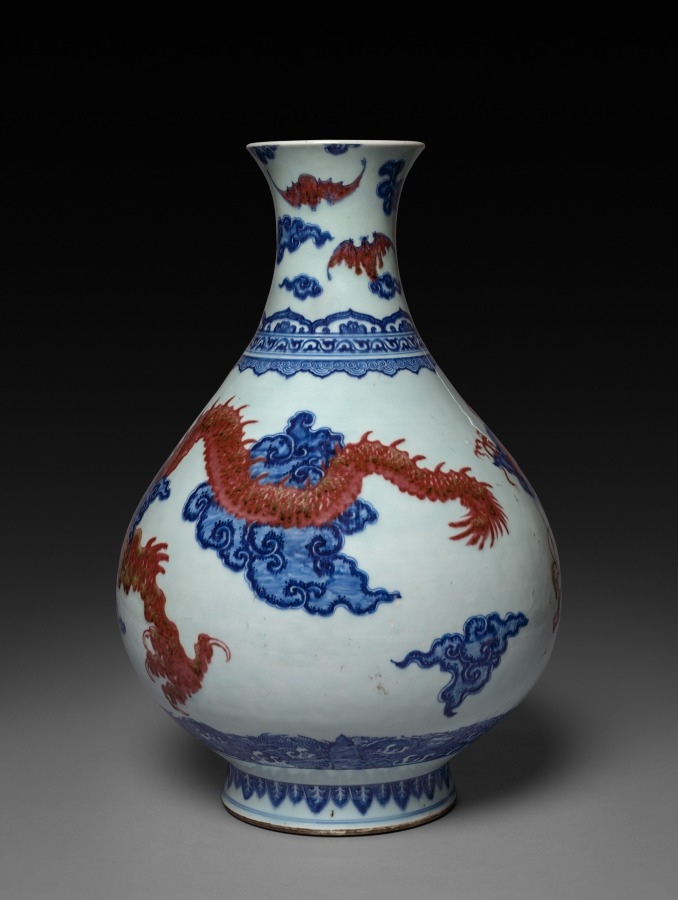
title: Vase with Dragon and Cloud Decoration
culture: China, Qing dynasty (1644-1911), Yongzheng reign (1723-35)–Qianlong reign (1736-95)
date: mid- to late 1700s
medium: porcelain with underglaze blue and red decoration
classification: Ceramic